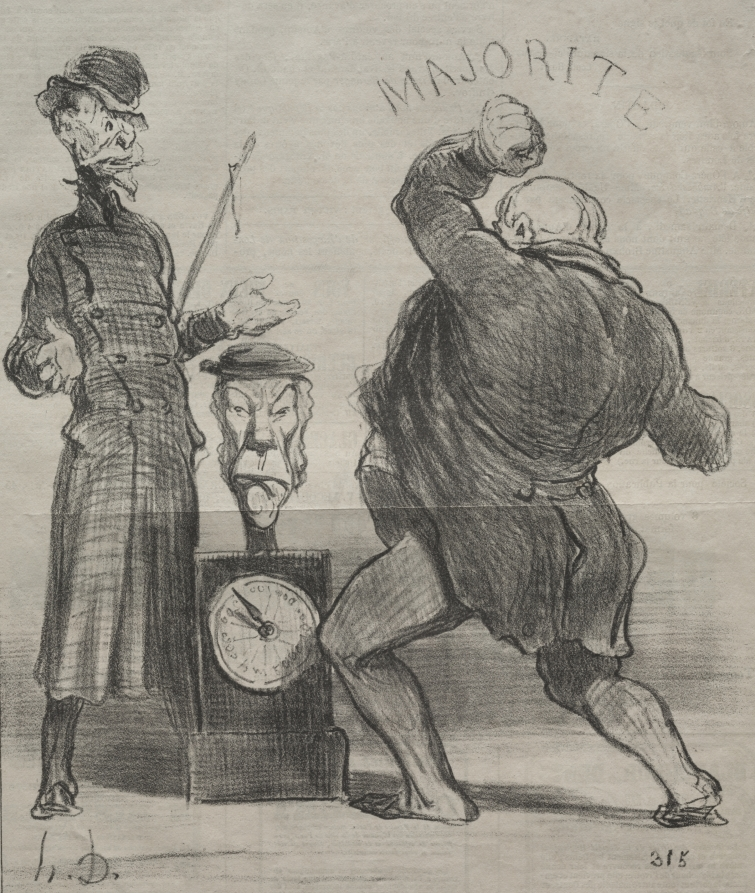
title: Testing His Strength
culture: France, 19th century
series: News of the Day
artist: Honoré Daumier (French, 1808–1879)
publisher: Aubert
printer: Ch. Trinocq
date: 1851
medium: lithograph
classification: Print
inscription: Above image, printed: ACTUALITÉS. / 183 ; Below image, printed: ESSAYANT SES FORCES / _Sacrebleu, comme vous y allez... vous allez finir par me demolir cette téte là!.....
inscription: Lower margin, printed: Chez Aubert & Cie. Pl de la Bourse, 29 Paris. / Imp de Ch. Trinocq, Cour des Miracles 9 à Paris.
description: This print was published in Le Charivari (August 8, 1851) as plate 183 from the series News of the Day.